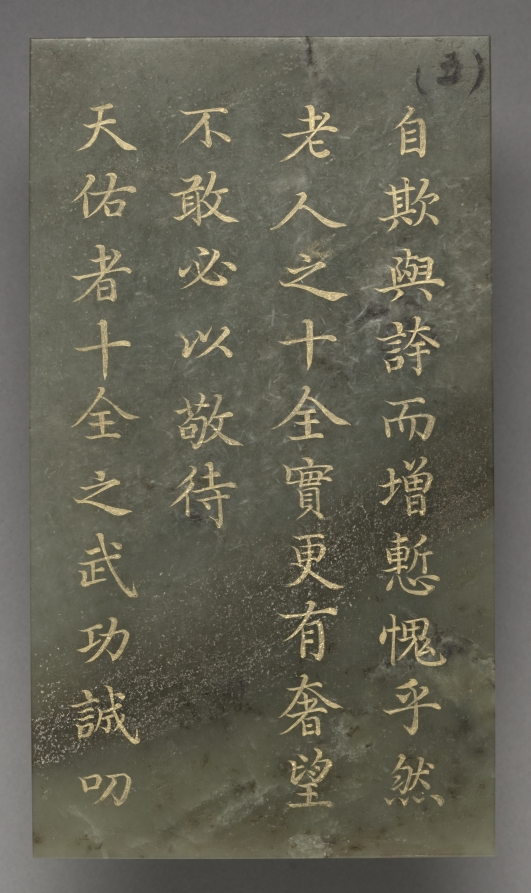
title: Tablet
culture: China, Qing dynasty (1644–1911), Qianlong reign (1736–95)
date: 1778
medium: jade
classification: Jade